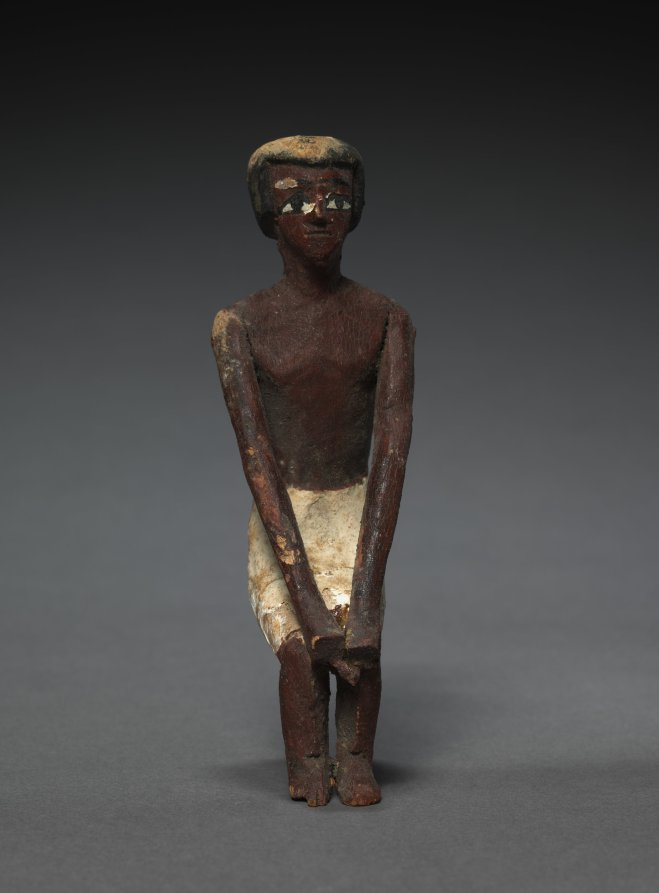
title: Seated Model Sailor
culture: Egypt, Middle Kingdom (2040–1648 BCE), Dynasties 11–12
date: c. 2000–1000 BCE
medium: painted sycamore fig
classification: Funerary Equipment